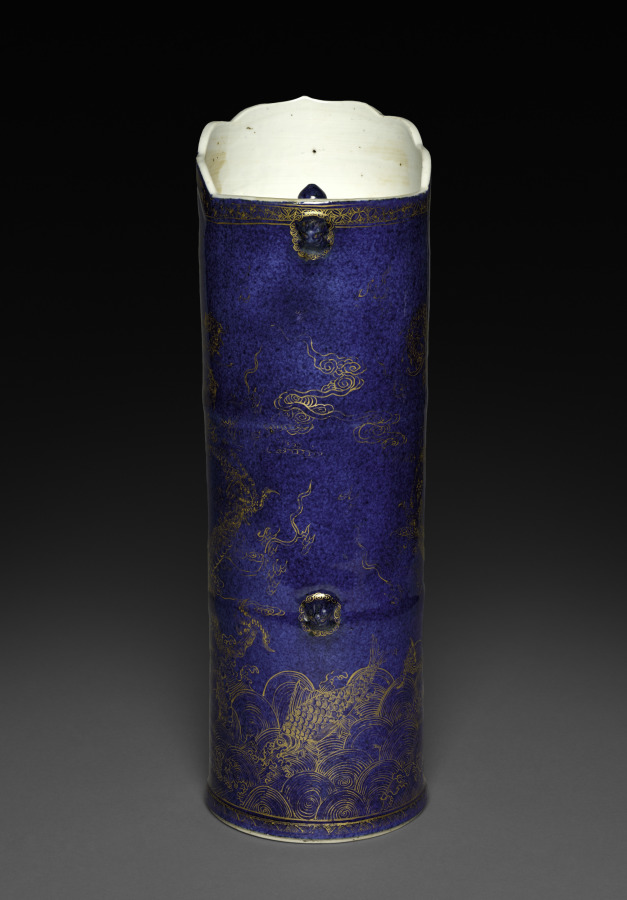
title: Cylindrical Ewer with Dragons Pursuing Flaming Jewel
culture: China, Jiangxi province, Jingdezhen kilns, Qing dynasty (1644-1911), Kangxi reign (1662-1722)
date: 1662–1722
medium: porcelain with powder blue glaze painted with gold decoration and supplied with metal fittings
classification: Ceramic